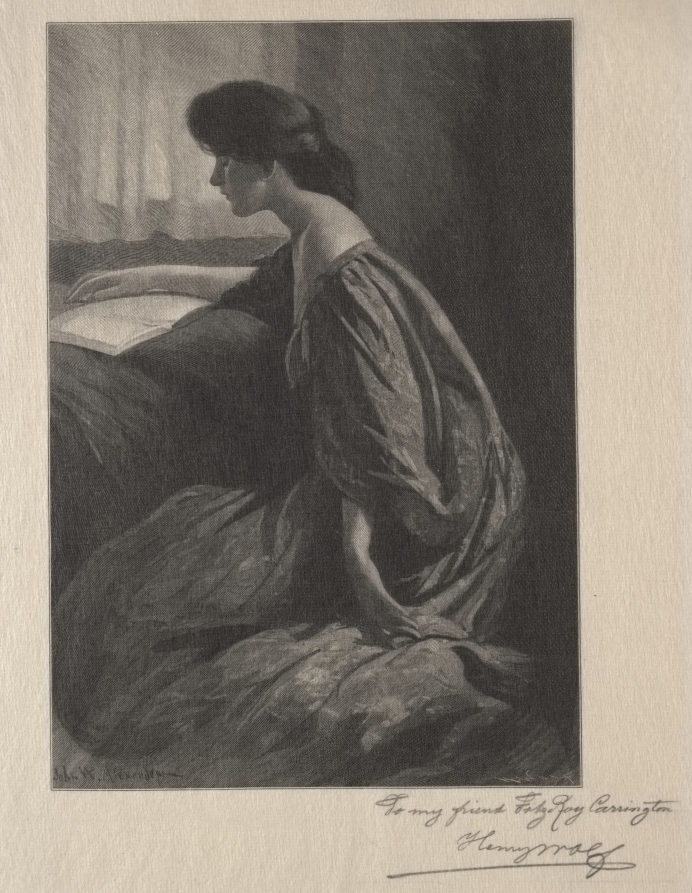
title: Girl Reading at a Window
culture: America, late 19th-early 20th century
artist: Henry Wolf (American, 1852–1916)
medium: wood engraving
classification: Print